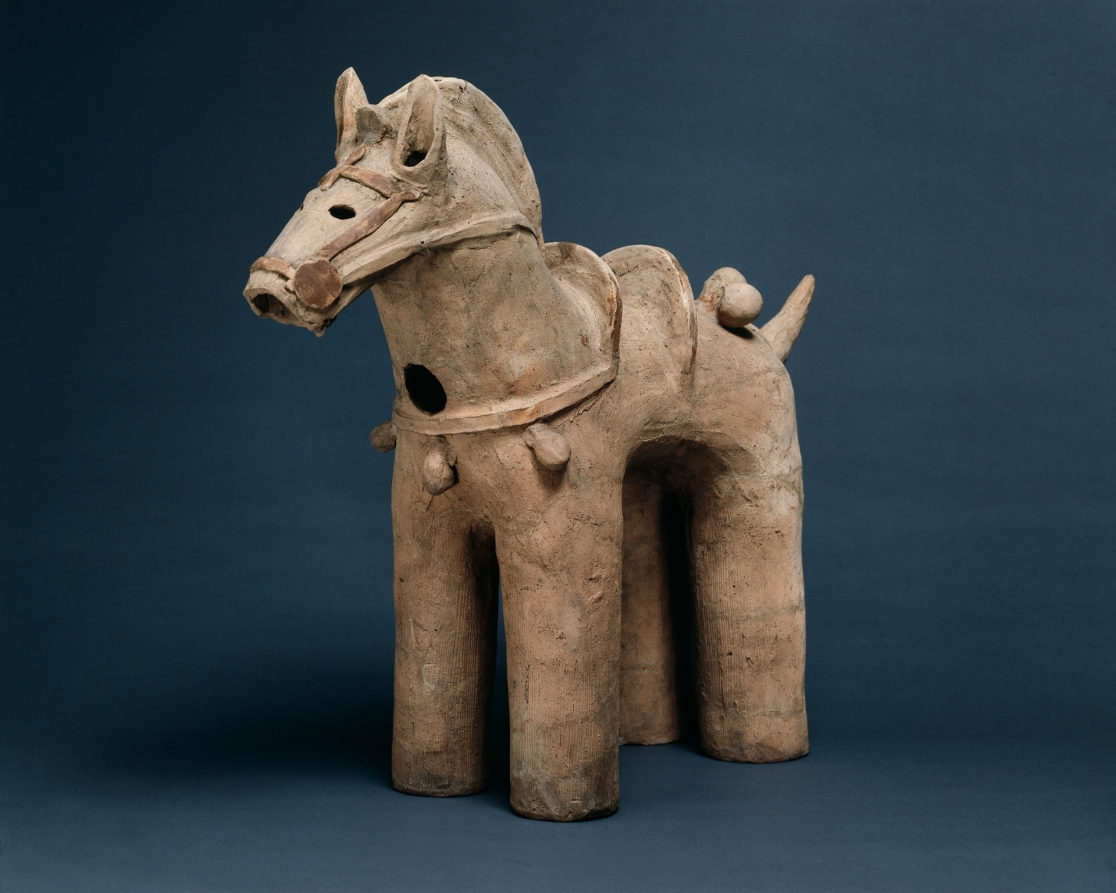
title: Haniwa Horse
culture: Japan, Kofun period (300–710 CE)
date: 400s–500s CE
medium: earthenware with traces of pigment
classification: Sculpture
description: This horse’s tack, with its round bells, resembles saddlery in fashion in Korea during the 400s–500s CE. Concurrent with mass migration from the Korean Peninsula, tombs covered with large earthen mounds similar to those on the Asian continent began to appear in Japan around the year 300 CE. Called “old mounds” (kofun), their surfaces were covered with hollow clay cylinders (haniwa). Sculptures of animals, buildings, and finally human figures followed, developing over the ensuing three centuries.